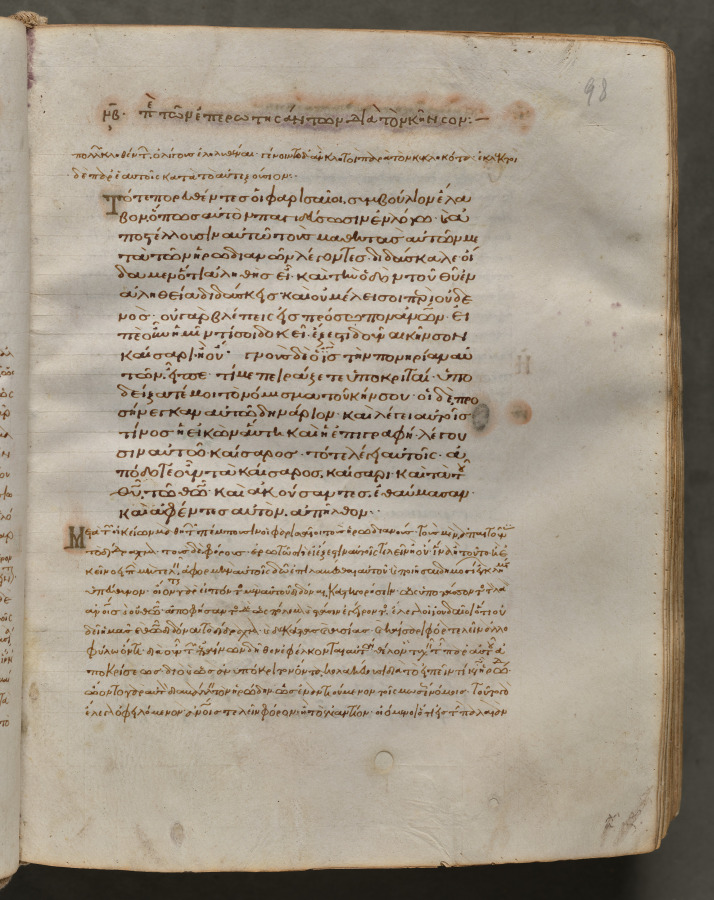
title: Text, folio 98 (recto), from a Gospel Book with Commentaries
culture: Byzantium, Constantinople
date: c. 1000–1100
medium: ink, tempera, and gold on vellum; leather binding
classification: Bound Volume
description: Each of the four gospels in this book opens on a page with brilliantly illuminated borders depicting the author of the text as well as birds-principally peacocks, symbols of the immortality of the soul-and fountains, representing the fountain of life and the salvation of the soul. This volume consists of 428 leaves with texts in Greek. Its level of sophistication suggests that it was probably written and decorated in a monastery in Constantinople.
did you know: Gospel Books were carried in procession through Byzantine churches.